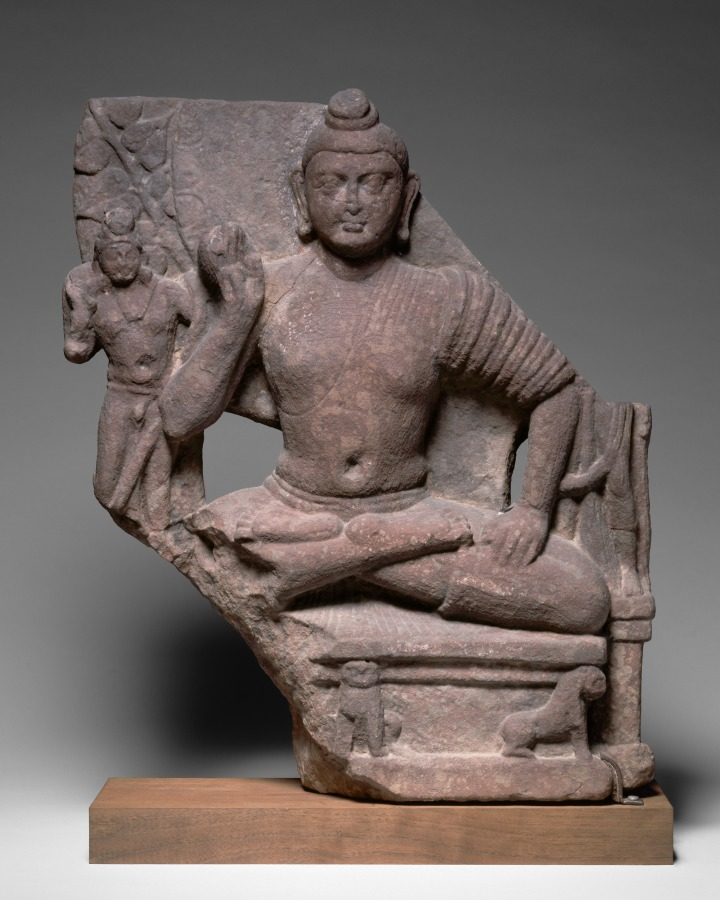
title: Seated Shakyamuni Buddha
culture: Northern India, Uttar Pradesh, Mathura, Kushan period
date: c. 120 CE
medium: red mottled sandstone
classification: Sculpture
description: This early form of the Buddha image depicts him seated on an altar under the Bodhi tree. A coiled topknot of hair and elongated earlobes refer to his life as a prince when he wore a turban and heavy earrings. Behind his head is a solar disk, like a halo, and lions on the throne indicate the spreading of his teachings in all four directions.